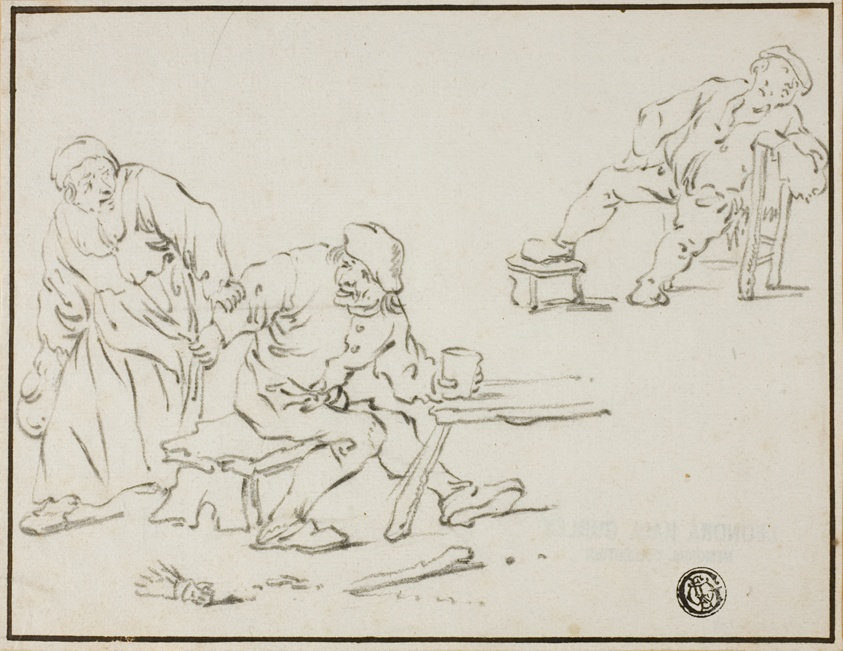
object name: Drawing and Watercolor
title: Tavern Scene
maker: After Adriaen van Ostade; Dutch, 1610-1685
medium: Black chalk on ivory laid paper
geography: Holland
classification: chalk; drawings (visual works); prints and drawing